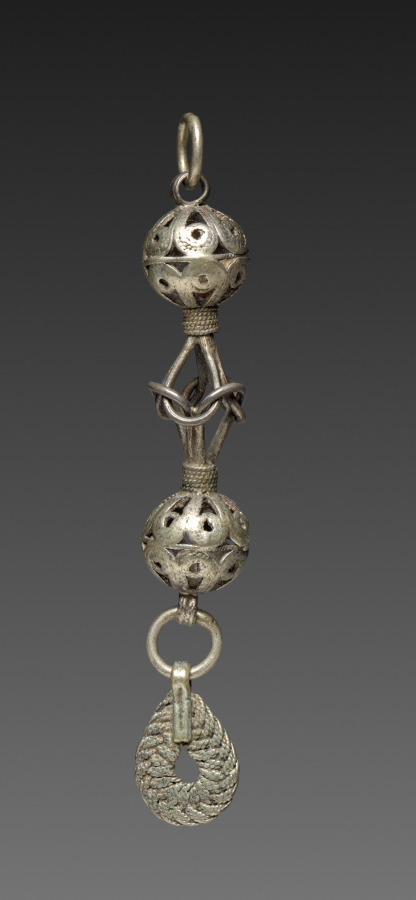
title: Button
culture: Balkans, 19th century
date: 1800s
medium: silver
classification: Jewelry